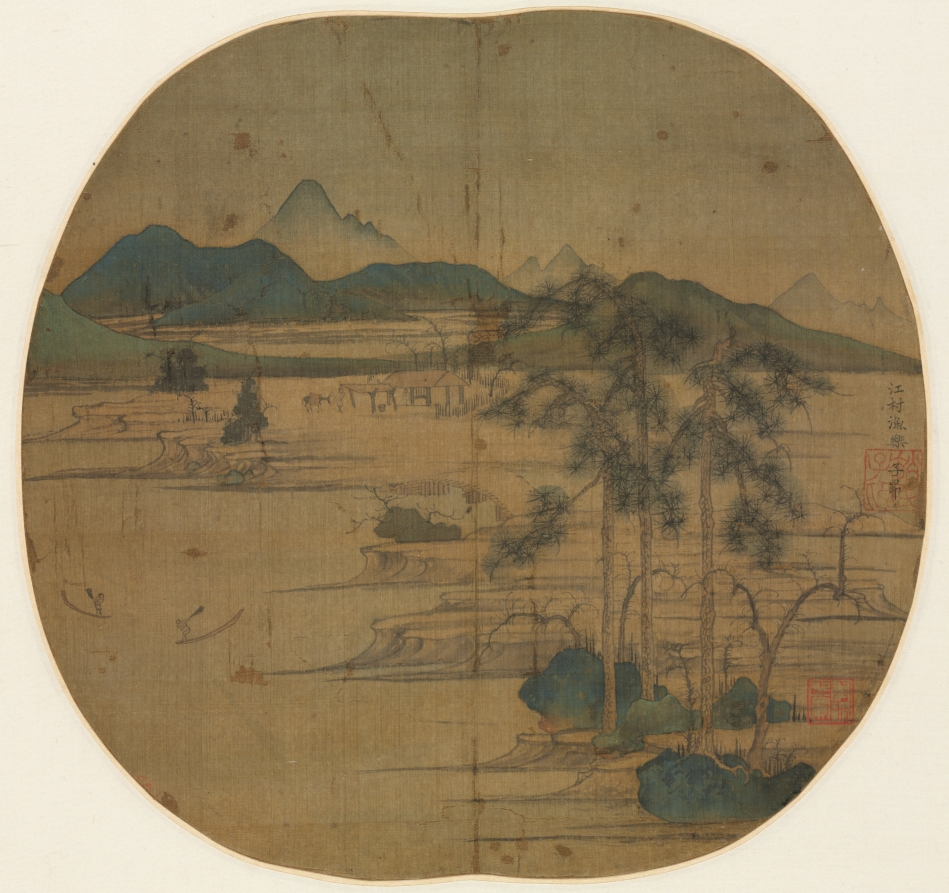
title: River Village: Fisherman's Joy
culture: China, Yuan dynasty (1271-1368)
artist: Zhao Mengfu (Chinese, 1254–1322)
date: c. 1302–3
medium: Fan painting mounted as album leaf; ink and color on silk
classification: Painting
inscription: 江村漁樂 子昂。 [印] 趙氏子昂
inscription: 1 colophon and 2 additional seals: 1 colophon, unsigned; 2 seals of C. C. Wang 王季遷 (1907–2003).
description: The artist of this blue-green–style landscape, Zhao Mengfu, was a southerner, versed in all fields of literati pursuits, such as calligraphy and connoisseurship. A princeling of the defeated Southern Song dynasty, he was nevertheless successfully recruited by Khubilai Khan to the Mongol court in the new capital, Dadu (modern Beijing), in 1286. This painting combines a distinctively southern flat watery landscape combined with features of the northern landscape tradition, notably the spiky trees, branches, and rough-surfaced rocks.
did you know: Various human elements can be found in the painting: two fishermen, an individual with a donkey, and someone in the house.